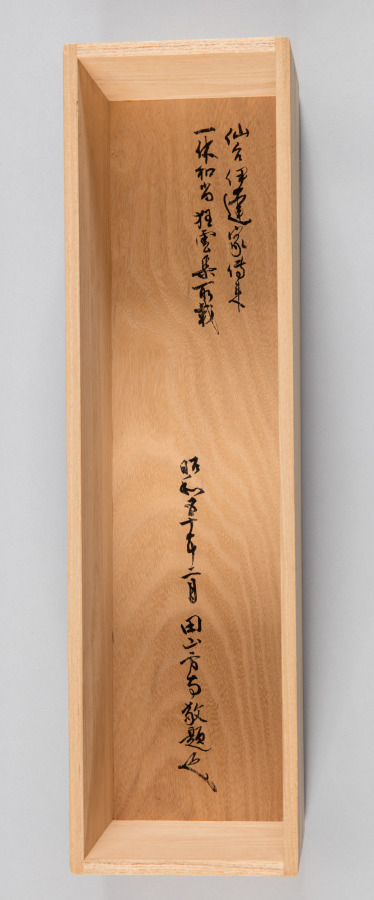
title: Reflections of Priest Foyen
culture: Japan, Muromachi period (1392–1573)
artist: Ikkyū Sōjun (Japanese, 1394–1481)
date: 1400s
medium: hanging scroll, ink on paper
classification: Painting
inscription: signed: "Kido nanasei son, Ikkyūshi Sōjun sho (Written by Ikkyū Sōjun, the seventh generation of Kido)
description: Left by his mother at a small Zen temple in Kyoto at the age of six, Ikkyu later drew on his early studies and experiences for his writings, which focused on his keen interest in the Chinese classics. Poetry in particular was a favorite subject and images from classical poetry or passages from favorite poems or commentaries frequently provided Ikkyu with the core ideas for his own work. A rare example of his calligraphy, this narrow scroll contains a verse in eight phrases, each comprising four characters. The whole verse is organized in three towering lines of brusque, emphatic calligraphy augmented by Ikkyu's signature-the two lines of running script in the lower left corner. The text refers to a passage included in the Chronicle of the Zen Sect that contains a cautionary reminder attributed to the legendary Chinese monk Foyen Qingyuan (1067-1120), long revered in Japan. The initial phrase begins: "Life is a mirage."